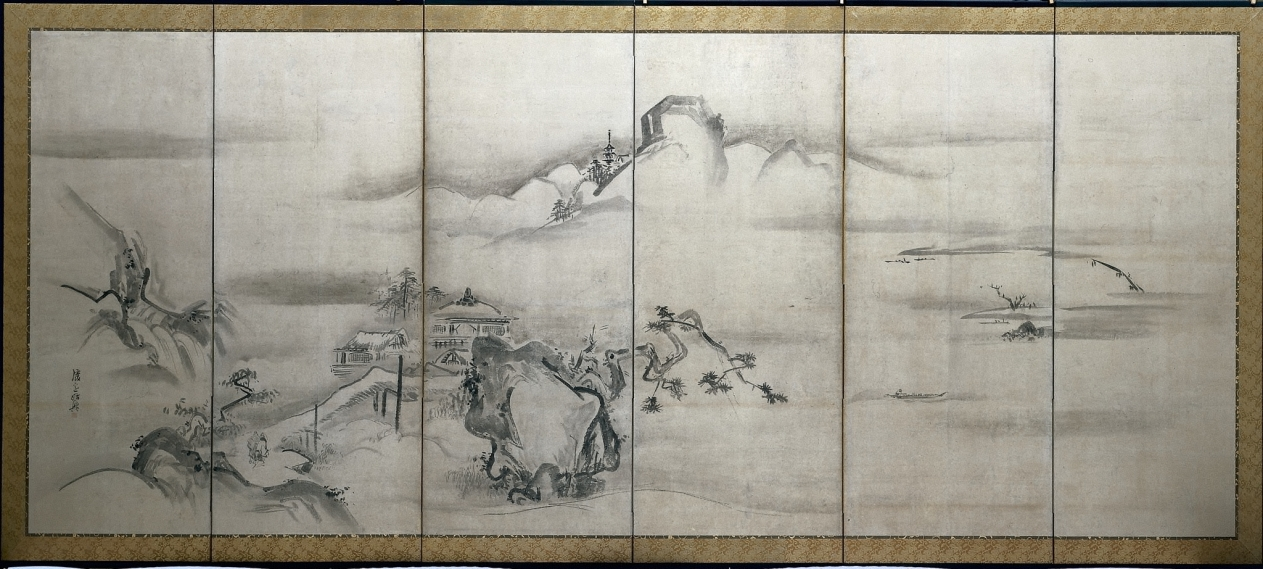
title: Eight Views of the Xiao and Xiang Rivers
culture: Japan, Edo period (1615–1868)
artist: Watanabe Shikō (Japanese, 1683–1755)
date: 1700s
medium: Six-panel folding screen; ink on paper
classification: Painting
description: Watanabe Shiko enjoyed a versatile and successful career, as well as a privileged upbringing, in Kyoto. His surviving work indicates a capacity to diligently study, master, and then interpret several painting techniques—each of which varies considerably in appearance. These byobu (folding screens), for instance, reflect training in the Kano school idiom that favored a monochromatic ink palette, vigorous brushwork, and traditional Chinese—rather than Japanese—subject matter. Shiko rendered this scenery in a particularly expansive manner, suggesting the vastness of China's topography relative to Japan's. Frequent visitors to the museum will recall that Shiko also painted the collection's favored pair of byobu, the Irises (CMA 1954.603).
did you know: This screen forms a pair with CMA 1968.267.